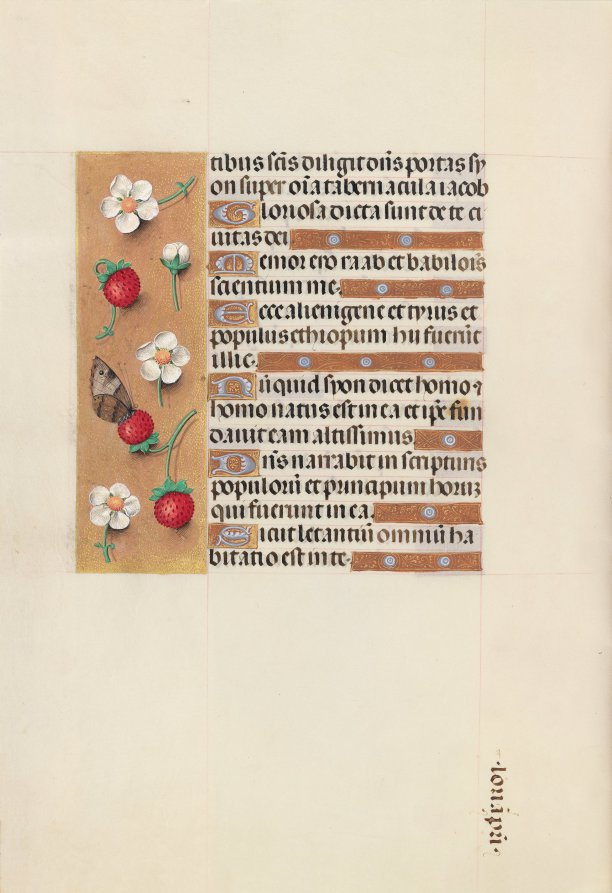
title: Hours of Queen Isabella the Catholic, Queen of Spain: Fol. 106v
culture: Flanders, Ghent and Bruges, late 15th century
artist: Master of the First Prayerbook of Maximillian (Flemish, c. 1444–1519)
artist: and Associates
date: c. 1500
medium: ink, tempera, and gold on vellum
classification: Bound Volume